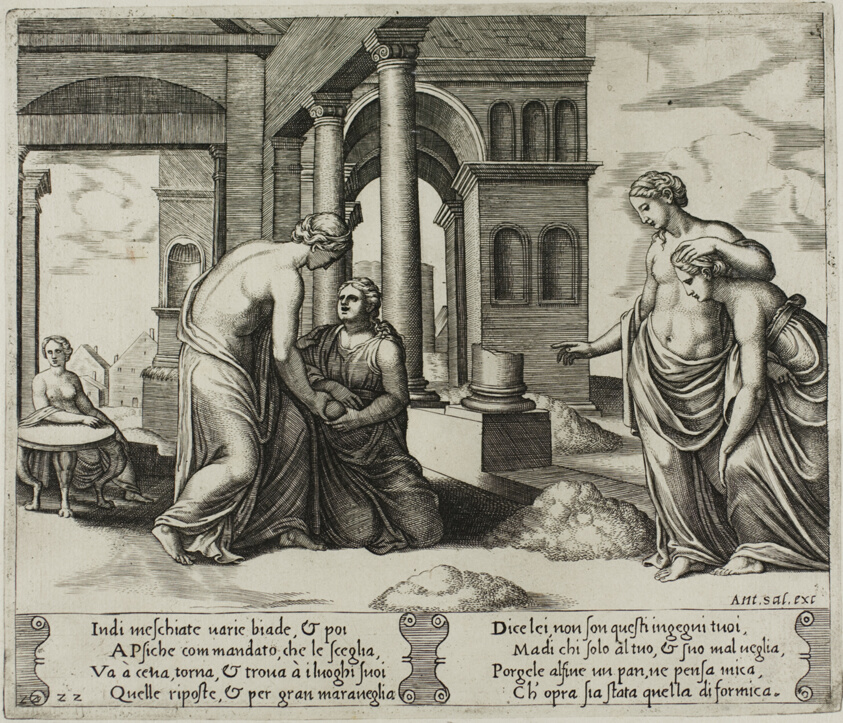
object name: Print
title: Venus Ordering Psyche to Sort a Heap of Grain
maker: Master of the Die (Italian, active c. 1530-1560); after Michiel Coxcie I (Flemish, 1499-1592); in turn, inspired by Raffaello Sanzio, called Raphael (Italian, 1483-1520)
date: 1530/40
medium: Engraving in warm brown ink on cream laid paper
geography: Italy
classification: engraving; print; prints and drawing